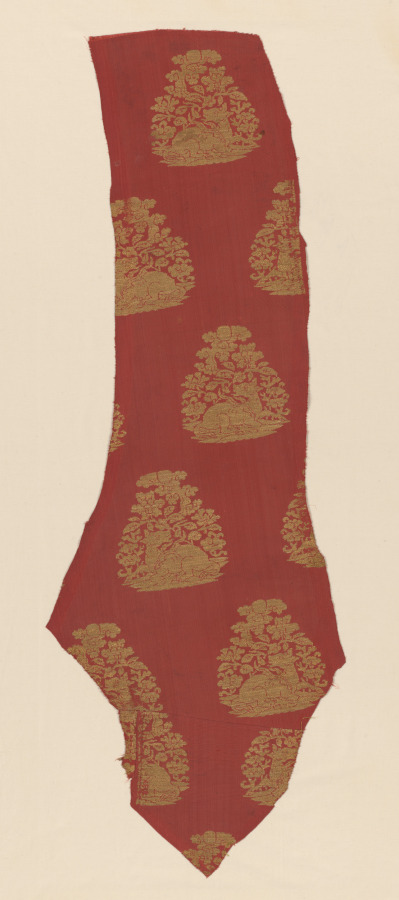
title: Brocade with Djeiran Gazing at the Moon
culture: China, Jin dynasty (1115-1234)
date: 1115–1234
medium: Silk and gold thread; tabby, brocaded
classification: Textile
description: The mysterious image of a deerlike animal gazing up at the moon among clouds has been variously interpreted over many centuries. The animal, lying down with one foreleg extended and looking back, originated as a djeiran, or Central Asian antelope. Commonly appearing on Sogdian silver from the 600s onward, the motif migrated via the trade routes to northern China. There, during the Jin and Yuan (1279–1368) dynasties, it was very popular and always depicted with the moon supported by clouds. Chinese writers often identify the djeiran as the mythical rhinoceros (xi'niu) that is said to gaze at the moon, or as the cow of Wu "panting upon seeing the moon."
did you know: The gold-brocaded pattern is repeated in staggered rows with alternating orientations.